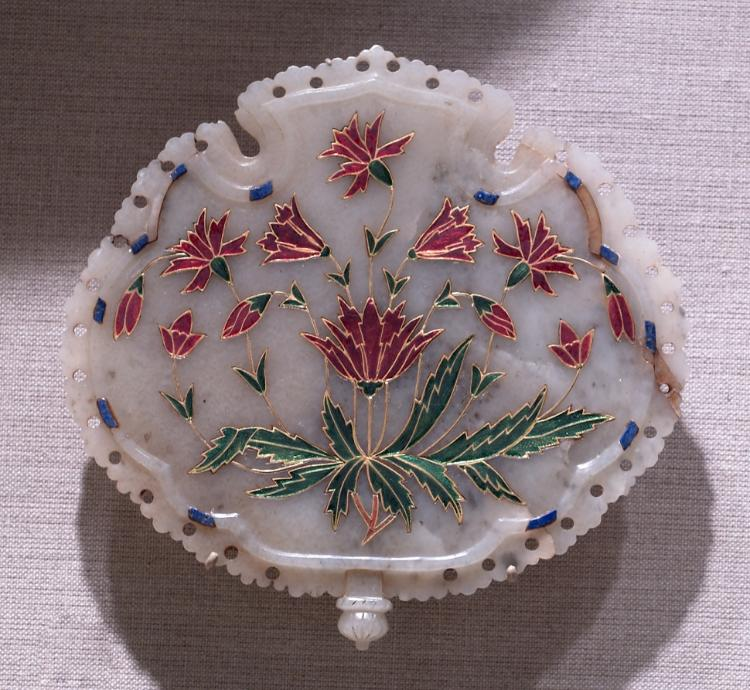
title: Mirror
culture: India, Mughal dynasty (1526-1756)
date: early 18th Century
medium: jade with gold and enamel inlay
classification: Jade